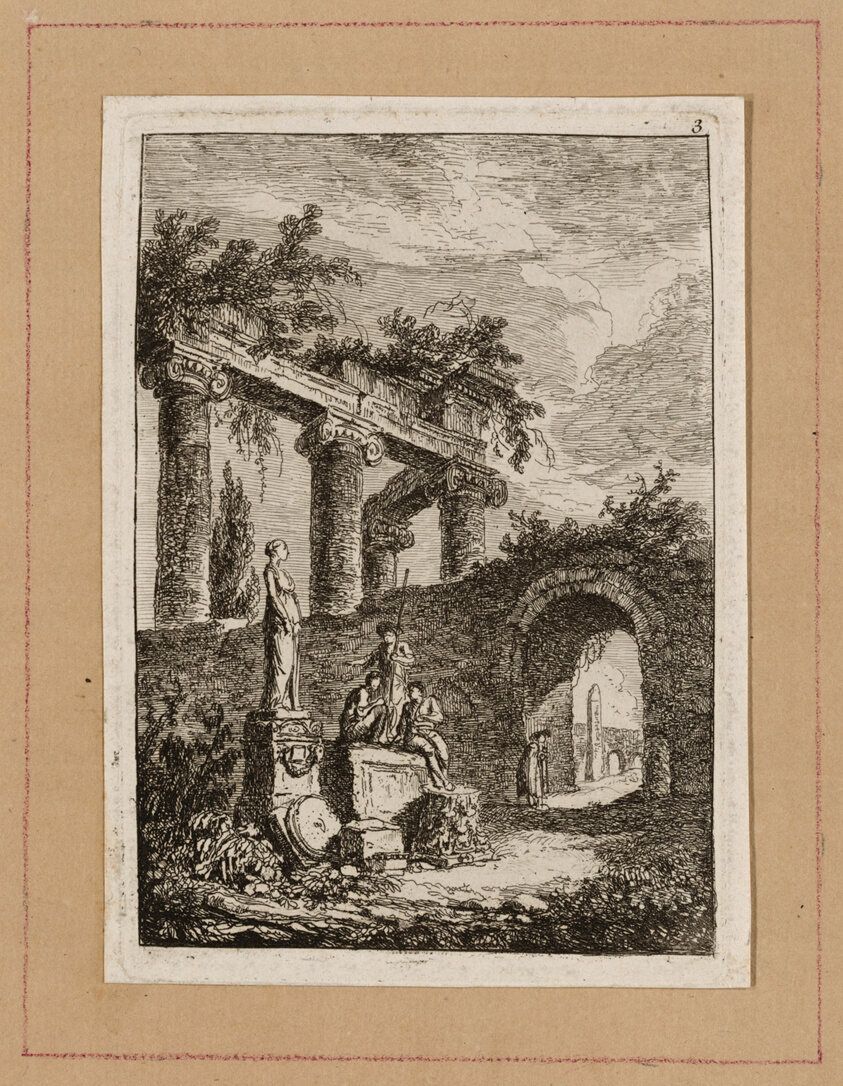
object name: Print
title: Plate Three from Evenings in Rome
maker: Hubert Robert (French, 1733–1808)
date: 1763/64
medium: Etching in black on off-white laid paper, tipped onto tan laid paper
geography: France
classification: etching; paper; print; prints and drawing